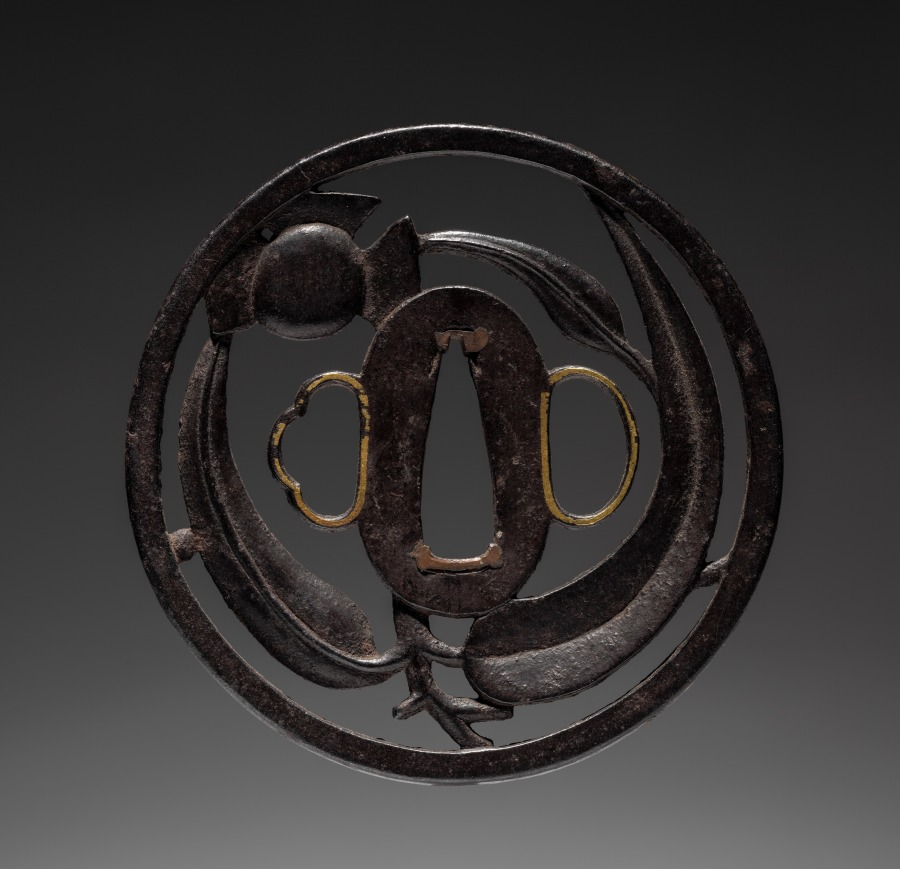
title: Sword Guard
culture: Japan, Edo period (1615–1868)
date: c. 1800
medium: iron (Choshun type)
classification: Arms and Armor